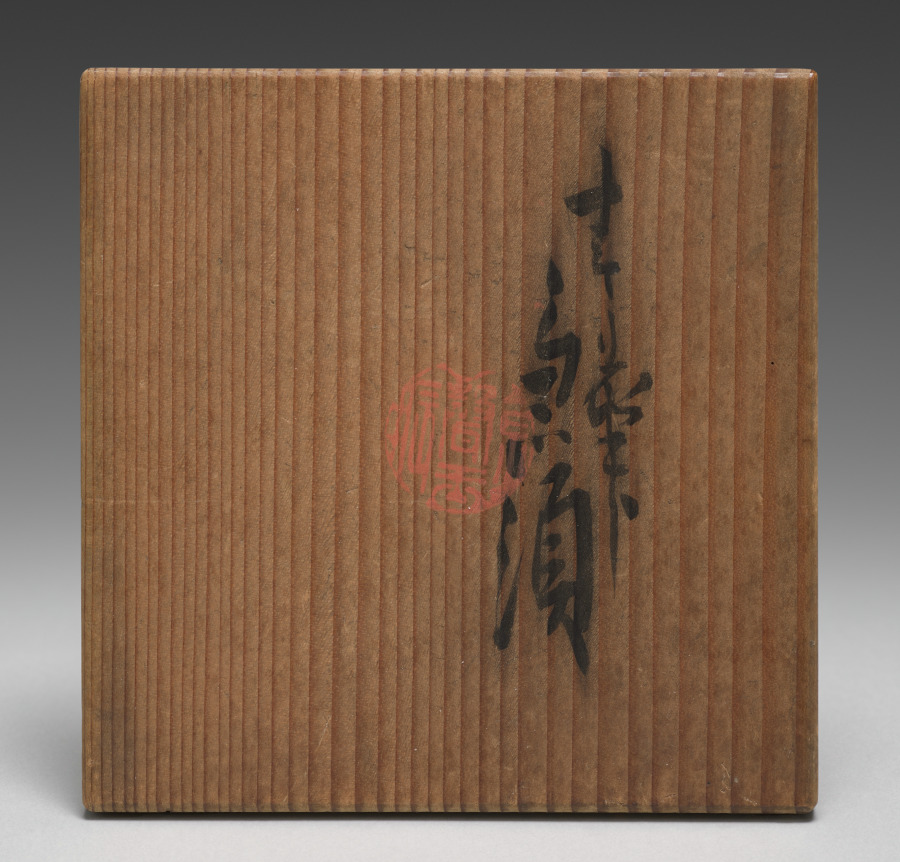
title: Teapot with Begonias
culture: Japan, Meiji period (1868–1912)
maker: Seifū Yohei III (Japanese, 1851–1914)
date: 1897–1914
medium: Porcelain with underglaze and overglaze colors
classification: Ceramic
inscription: 清風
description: This teapot has complex surface treatment: a design of begonias in modulated underglaze blue for the leaves and stems as well as thick overglaze white with incised lines to define the petals, plus small areas of underglaze yellow at their low-relief centers. A band of underglaze blue gives further definition to the lid’s handle, and the area just above the base has a double band of blue above a row of snail-shell curls. Unlike many other teapots, which have marks on their bases, this one has “Seifu” incised into one of its sides in relatively large characters. It is the side that would face the host if the teapot were held by the handle with the right hand, which would be the expectation.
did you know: This teapot with begonias combines underglaze blue with subtle use of yellow and white enamels.